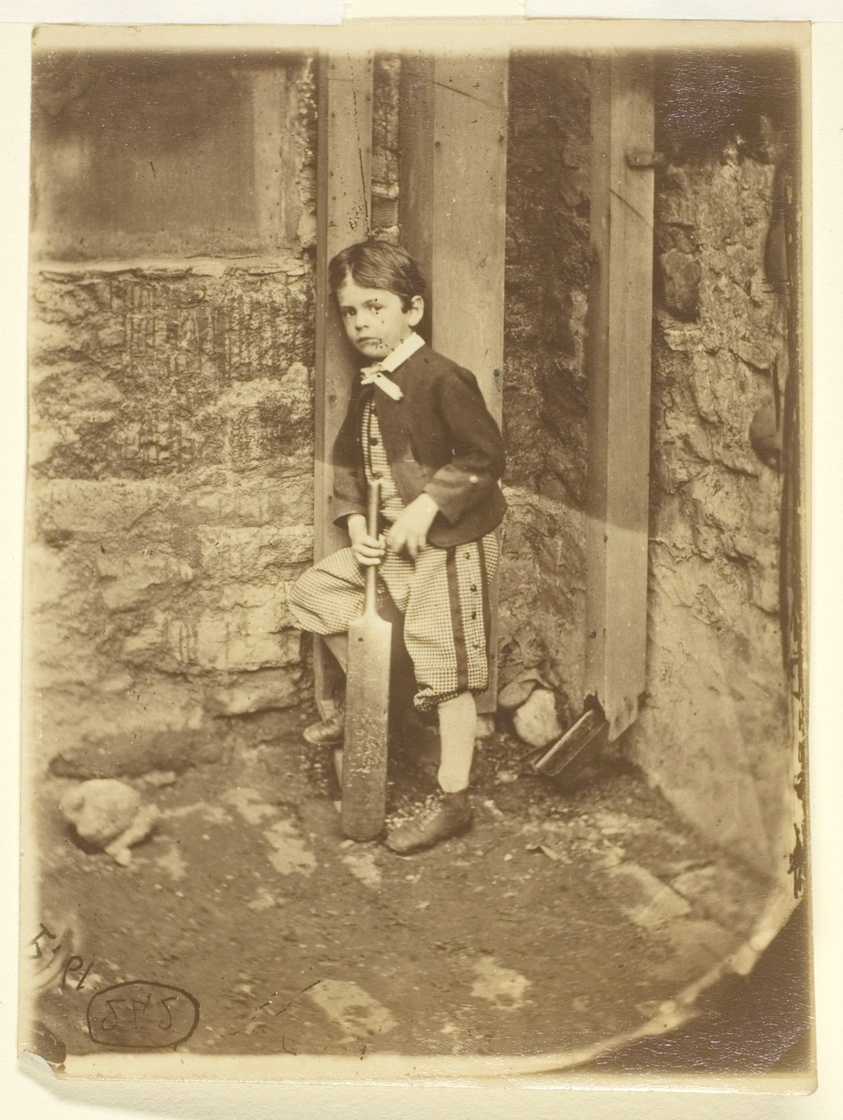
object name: Photograph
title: Charles (Robin) Langton Clarke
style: 19th century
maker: Lewis Carroll (Charles Lutwidge Dodgson); English, 1832–1898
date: 1864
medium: Albumen print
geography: England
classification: albumen silver print; photographic process; photography; photograph